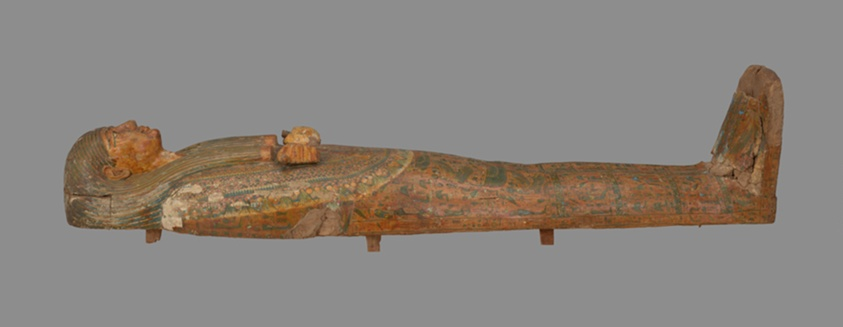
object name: Funerary Object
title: Coffin of Nespahertahat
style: twenty-first dynasty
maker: Egyptian; possibly Deir el-Bahri, Thebes (now Luxor), Egypt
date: Third Intermediate Period, Dynasty 21 (about 1069 –945 BCE)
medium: Wood and pigment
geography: Ancient Egypt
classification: coffin; ancient art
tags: funerary art